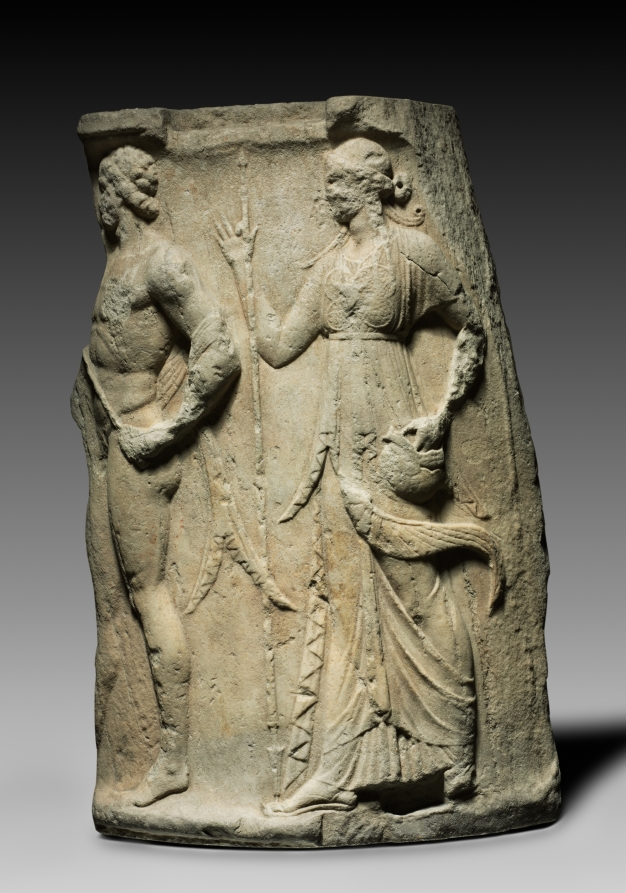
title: Circular Altar with Hermes and Pallas Athena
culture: Roman, said to be from Corfu, Greece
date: 100 BCE–100 CE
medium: marble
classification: Sculpture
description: Preserving two figures (plus a faint foot) striding across a curving surface, this fragment constitutes approximately 1/6th of a large circular altar or statue base. Its full circumference accommodated 12 figures—likely the Olympian deities. Athena—with spear, helmet, and stylized aegis, or breastplate—is with either the smith god Hephaistos, holding a hammer, or the messenger god Hermes, with his staff. Now lost are Zeus, Poseidon, Demeter, and others. The eclectic carving style includes stylized drapery with zigzag and swallowtail folds, recalling the Archaic period (600–480 BCE), on tall and slender figures characteristic of later times.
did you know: Beyond the twelve Olympian deities, Greeks and Romans worshipped numerous other gods and goddesses.